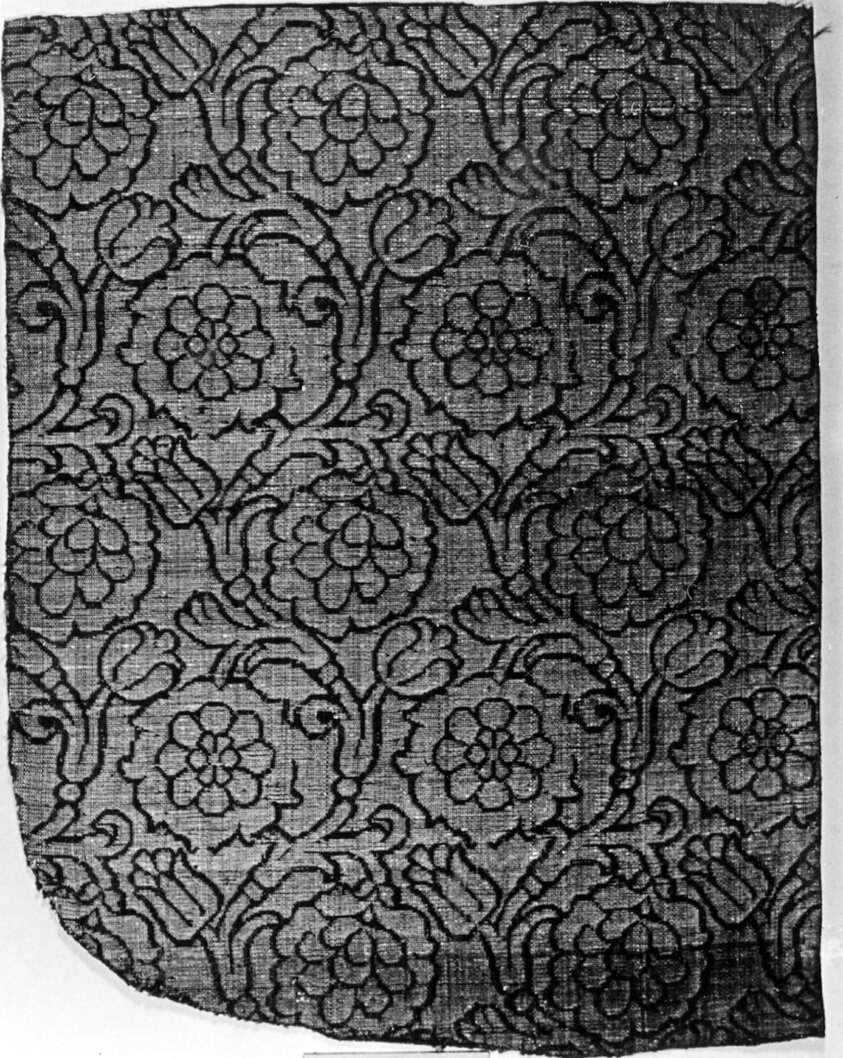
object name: Textile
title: Fragment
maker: Italy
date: 1650/1700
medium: silk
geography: Italy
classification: textile; weaving